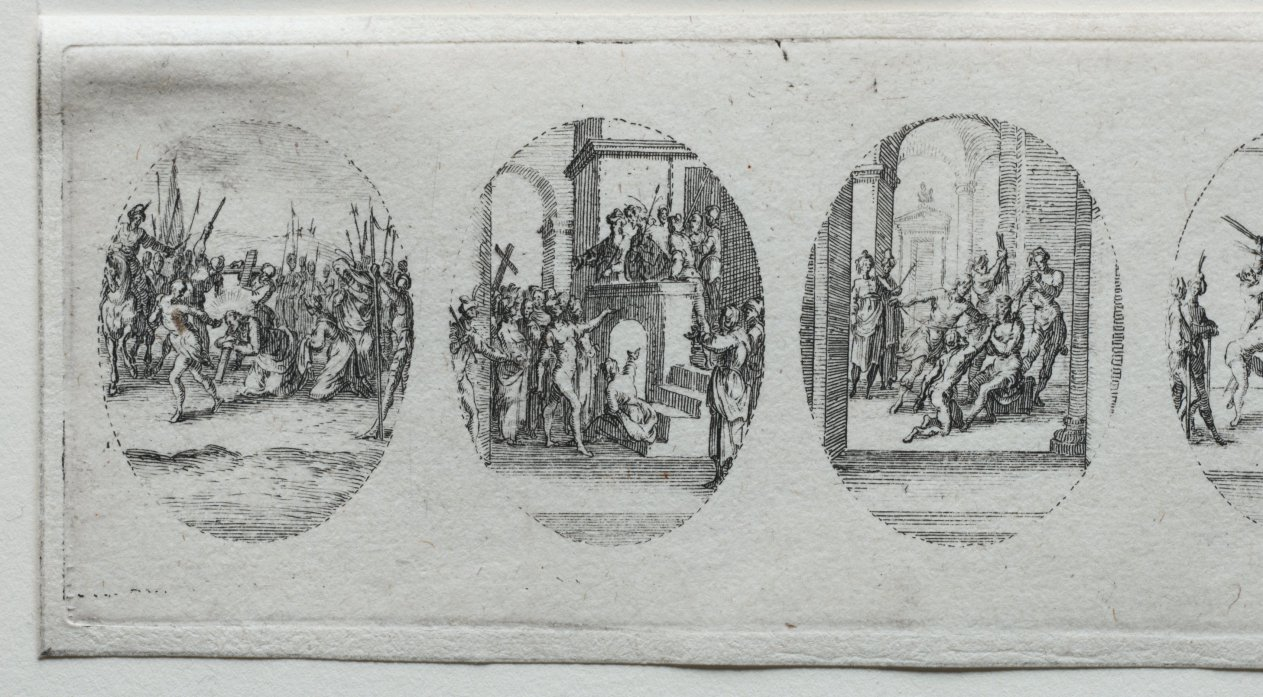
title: The Mysteries of the Passion: Christ Presented to the People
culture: France, 17th century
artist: Jacques Callot (French, 1592–1635)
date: 1631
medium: etching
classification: Print